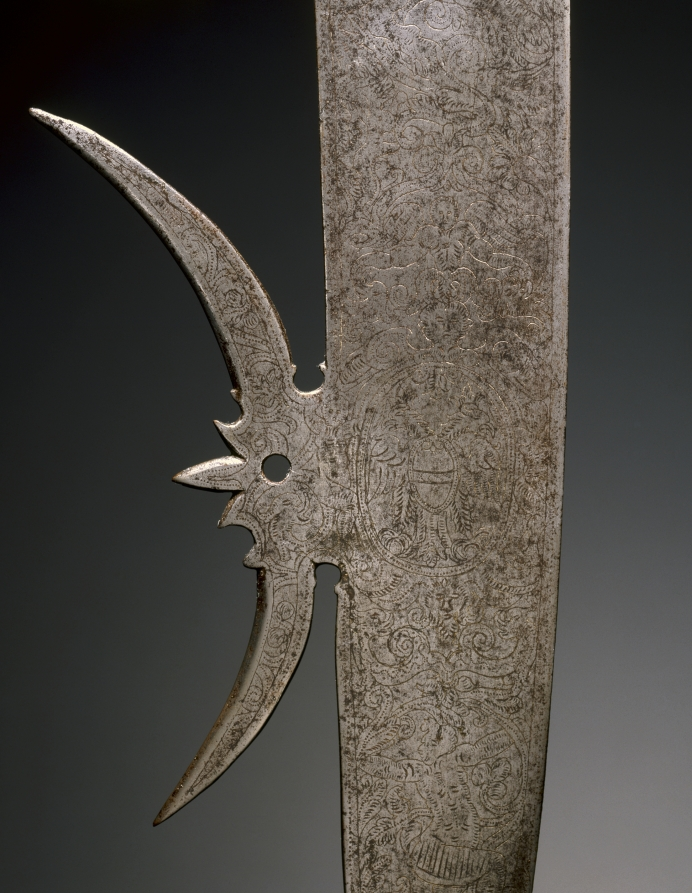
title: Glaive (with Arms of Giustini Family)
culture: Italy, Venice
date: c. 1600–1620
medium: steel, etched; wood haft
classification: Arms and Armor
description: A glaive is a long staff weapon with a large cleaver or knife-like blade. The flat steel blade is conducive to ornamental decoration such as heraldic devices. The decorative nature of this weapon made it a favorite for ceremonial use.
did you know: The large number of surviving glaives that are decorated with the arms of Venetian families indicate its popularity in the city of Venice.